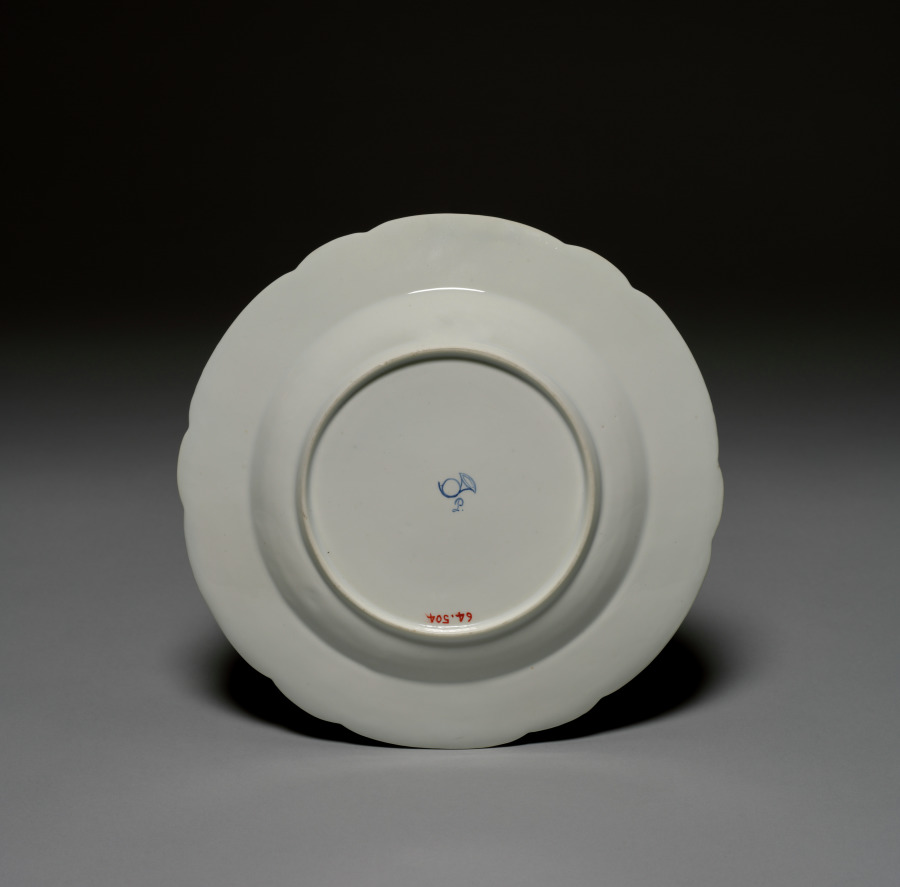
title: Plate (Assiette)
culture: France, Chantilly, 18th century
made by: Chantilly Porcelain Factory (French)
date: c.1785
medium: Tin-glazed soft-paste porcelain with enamel decoration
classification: Ceramic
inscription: [In blue enamel, hunting horn and "L"]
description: This plate is part of a dinner service commissioned by Louis Joseph, duke of Bourbon, prince of Condé. Painted with his coat of arms, composed of three fleur-de-lys encircled by a cord holding up a pendant with the order of the Holy Spirit and surmounted by the prince’s own crown, this plate’s decoration reinforces the prince’s position as an elite member of the French royal court.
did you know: The glaze of this plate contains tin, an early practice used at the Chantilly porcelain factory that counteracted the yellowish tint of the soft-paste porcelain with a white, opaque finish.